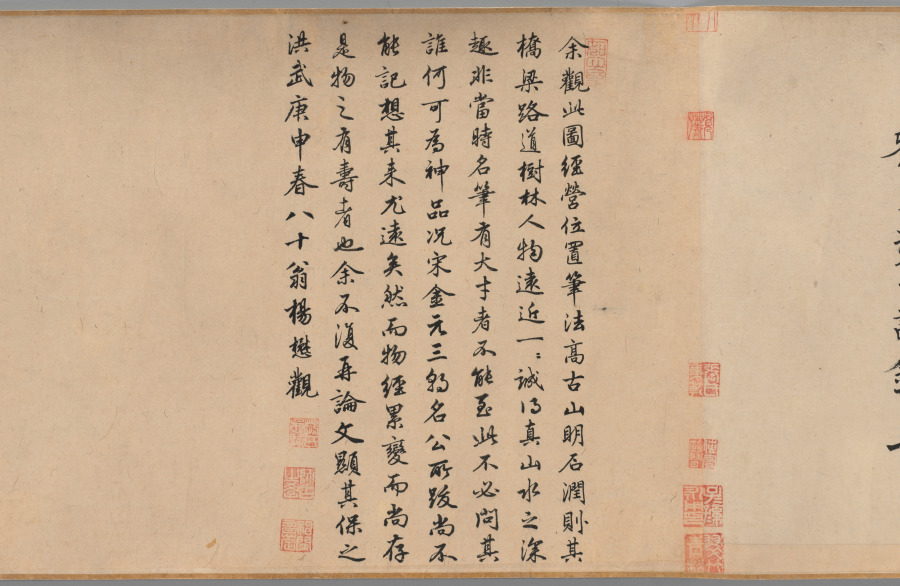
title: Streams and Mountains without End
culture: China, late Northern Song dynasty (960-1127) - Jin dynasty (1115-1234)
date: 1100–1150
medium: handscroll; ink and slight color on silk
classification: Painting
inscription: 9 colophons and 48 seals: 1 colophon, dated 1205, of Wang Wenwei 王文蔚 (dates unknown); 1 colophon, dated 1205, of Li Hui 李惠 (dates unknown); 1 colophon of Weiluo Tian Xie 蔚羅田獬 (dates unknown); 1 colophon, dated 1214, of He Yan 何言 (dates unknown); 1 colophon, dated 1326, of Cao Yuanyong 曹元用 (d. 1329) 1 colophon, dated 1332, of Kangli Zishan 康里子山 (Naonao; 1295-1345); 1 colophon, dated 1336, of Liu Zai 劉載. (dates unknown); 1 colophon, dated 1380, and 4 seals of Yang Mao 楊懋 (1300-after 1380); 4 seals of the Hou family (ca. 1340); 1 colophon of Wang Duo 王鐸 (1592-1652); 4 seals of Zhang Bingqian 張秉乾 (juren of 1729); 8 seals of Liang Qingbiao 梁清標 (1620-1691); 2 seals of the Qianlong emperor (r. 1736-95); 4 seals of the Jiaqing emperor (r. 1796-1820); 3 seals of the Xuantong emperor (r. 1909-11); 2 seals of Ye Gongchuo 葉恭綽 (1881-1968); 17 seals of Zhang Yuan 張爰 (Zhang Daqian 張大千, 1899-1983).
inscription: Colophon 1. Wang Wenwei 王文蔚. Dated third month and third day, 1205, under the reign of Zhangzong of the Jin dynasty. 造物元無心，山川秀氣聚。畫手亦無盡，各出新意度。 誰將妙林泉，淡墨寫縑素。重巒疊嶂間，三兩人家住。 茅舍隔素籬，小橋通細路。溪上數葉舟，雅有物外趣。 嵓崦藏招提，依稀認窗戶。山色四時宜，雲煙自朝暮。 不知塵世中，此景在何處。收拾買山錢，投老好歸去。 泰和乙丑三月三日平原王文蔚謹再拜，書于河東縣署之野趣堂。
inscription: Colophon 2. Li Hui 李惠. The colophon was written three days before the Qingming Festival in 1205. 畫師慣在山中居，含毫吮墨聊自娛。 閑將一段冰霜絹，寫出千里江山圖。 前山後山互出沒，山腰林樾相縈紆。 危橋澗溜瀉鳴玉，山根一匯為平湖。 波平短艇快漁釣，雲深細徑來樵蘇。 僊宮梵宇占幽勝，雕欄複閣森蓬壺。 往來行客煙靄外，飄飄野店青帘孤。 人家雞犬聲相接，熙熙化日安唐宇。 嗟余嗜好何其迂，膏肓泉石真吾徒。 一行作吏墮世網，薄書汨沒勞奔趨。 千巖萬壑但夢想，故園三徑應將蕪。 披圖暫洗黃塵眼，拊膺三嘆空踟躕。 泰和乙丑清明前三日絳臺李惠書于舜城府署之九思堂。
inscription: Colophon 3. Weiluo Tian Xie 蔚羅田獬. 畫工紛紛不可紀，擺脫俗流幾人耳。 夫誰援筆掃鵝溪，一段風煙且千里。 白波青嶂渺無窮，水接山兮山插水。 小橋野店相勾連，古寺樓臺突兀起。 飄然氣象與神俱，但患未明孰姓氏。 郭熙雖老典型存，為問主公無乃是。 此畫世希當寶藏，無與碌碌同一視。 更看卷首數公詩，奇絕清新相表裏。 蔚羅田獬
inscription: Colophon 4. He Yan 何言. Written in 1214. 萬有來自無，一真歸所託。畫師得三昧，胸中幻丘壑。 百態逐墨破，群形隨筆落。地近迹分明，天遙痕隱約。 雲物自吐吞，峯巒非斧鑿。江鄉閴無市，谷關常不鑰。 中有野夫閑，童琴而歩鶴。酒斾出籬懸，漁舟臨岸泊。 澗樹蔽橋樑，巖松迷殿閣。岑疊宿霧重，野曠林煙薄。 危棧接縈紆，亂泉通脈絡。途中人往來，僕馬何羸弱。 怪石虎踡跼，古木龍蟠錯。一幅宜好收，千金非易博。 玉堂閑卷舒，眼界增寥廓。視險尚寛平，見危除慘虐。 氣象溢國華，川澤資廟略。功名業已書，歸去鞭先著。 但知色即空，何是今非昨。飽乎仁智心，箇中無限樂。 貞祐甲戌秋暮，東營何言題。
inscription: Colophon 5. Cao Yuanyong 曹元用 (d. 1329). Dated 1326. 岸擁危橋斷，溪浮小艇斜。 萬山最深處，依約兩三家。 泰定丙寅秋，曹元用題。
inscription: Colophon 6. Kangli Zishan 康里子山 (i.e., Kangli Naonao). The colophon bears a date of 1332. 右溪山圖，意韻蕭灑。一見使人有烟霞之想，真可珍藏。又有□金諸名勝題詩其左。兵火之餘， 殊不易得也。 至順三年暮春之月，康里子山跋。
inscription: Colophon 7. Liu Zai 劉載. 雲拂埜田閑種玉，雨餘巖溜碎傾金。 幾時也結團茆去，麟閤恬然不挂心。 至元二年正月，長安劉載載之謹錄上。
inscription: Colophon 8. Yang Mao 楊懋 (1300–after 1380). 觀此圖，經營位置，筆法高古，山明石潤。其橋梁、路道、樹林、人物、遠近；一一誠得真山水之深趣。非當時名筆有大才者不能至此。不必問其誰何，可為神品。况宋金元三朝名公所跋，尚不能記，想其來尤遠矣。然而物經累變而尚存，是物之有壽者也。余不復再論。文顯其保之。洪武庚申春，八十翁楊懋觀。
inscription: Colophon 9. Wang Duo 王鐸 (1592–1652). 文蓀親翁博雅，文詩鴻暢。舍弟持此喜觀，遂抽管題數語： 山勢委折，筆墨無痕。宋人中如此不多見也。譬之兵家，當是韓白。王鐸。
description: Streams and Mountains without End was a landmark acquisition of 1953, made just a year after Sherman Lee had returned to Cleveland as curator of Oriental art. He acquired it with the intention to provide "a more than adequate foundation for a fine collection of Chinese landscape painting." This impressive work demonstrates the culmination of stylistic developments in Chinese monumental landscape painting following the Northern Song tradition. It represents a journey through a landscape, making it a fitting metaphor for Lee’s journey of discovery and achievement over a lifetime.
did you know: The portrayal of the distant lands is rich with details like pavilions, villages, and human activities.